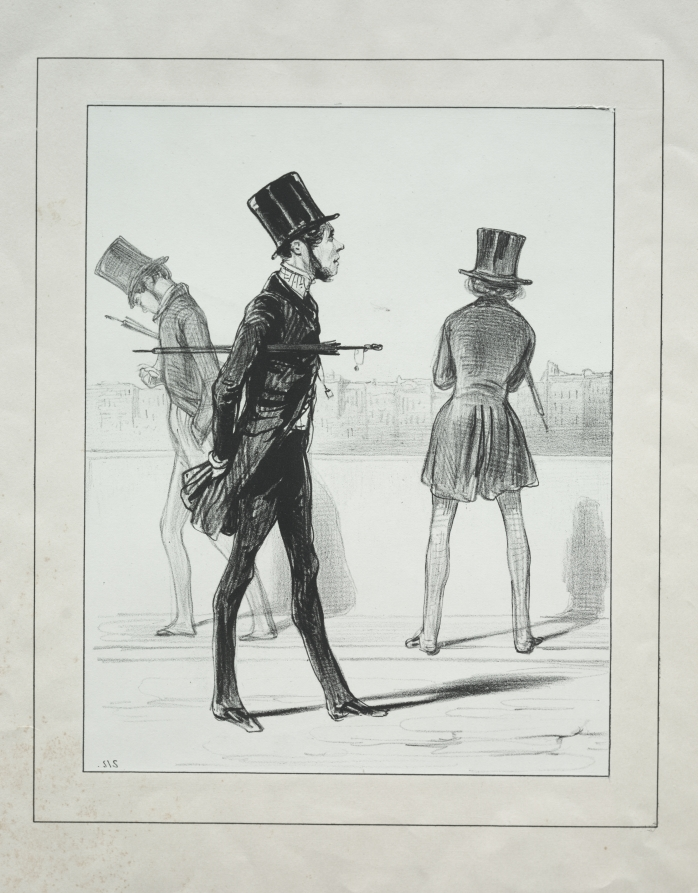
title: Fouberies de Femmes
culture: France, 19th century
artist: Paul Gavarni (French, 1804–1866)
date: 1837–41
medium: lithograph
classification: Print